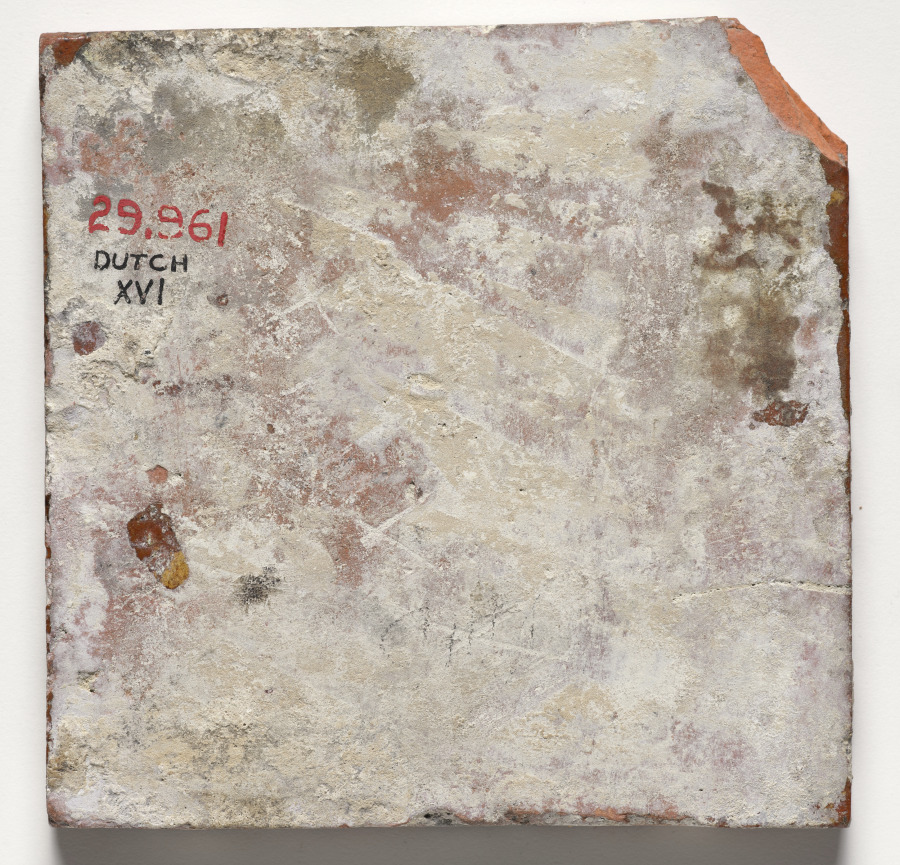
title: Tile- Foliated Pattern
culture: Netherlands, Holland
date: c 1500s–1600s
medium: glazed ceramic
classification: Ceramic